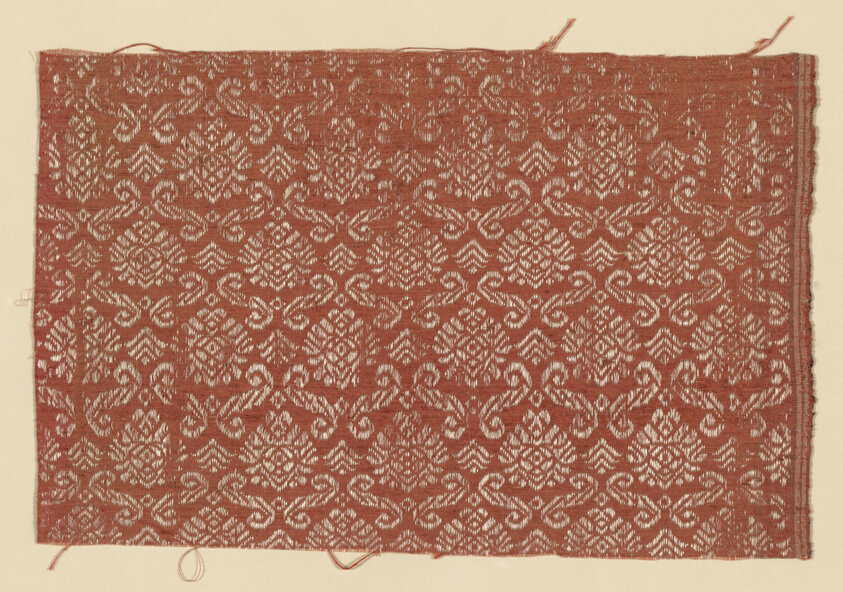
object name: Textile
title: Fragment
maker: Italy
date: 1650 / 1700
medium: Silk, plain compound cloth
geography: Italy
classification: textile; weaving